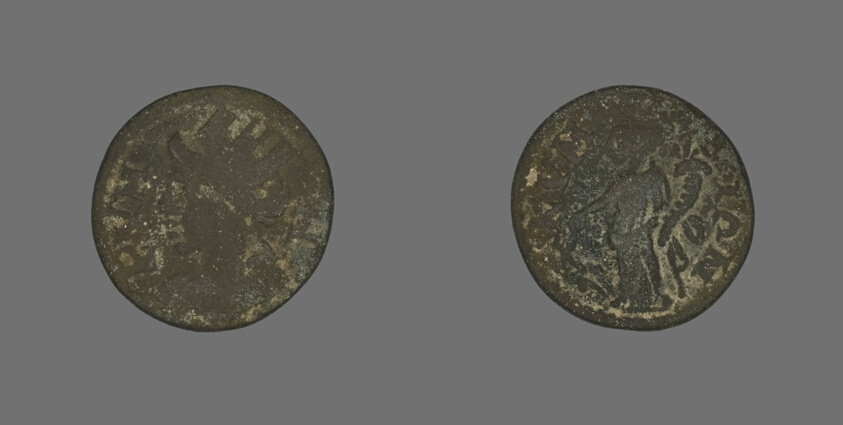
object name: Coin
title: Coin Depicting the Amazon Cyme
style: roman (ancient, style or period), ancient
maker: Roman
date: about 253-68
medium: Bronze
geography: Roman Empire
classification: coin; ancient art